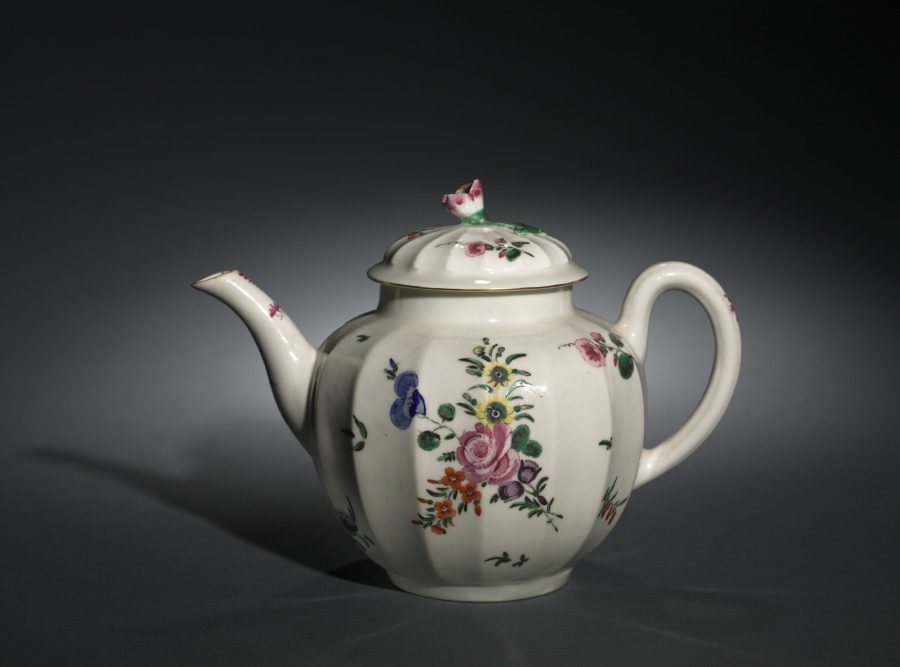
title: Teapot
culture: England, Worcester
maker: Worcester Porcelain Factory (British, established 1751)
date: c. 1755–75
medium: porcelain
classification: Ceramic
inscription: Mark on the bottom - An X with radiating lines inside a box.